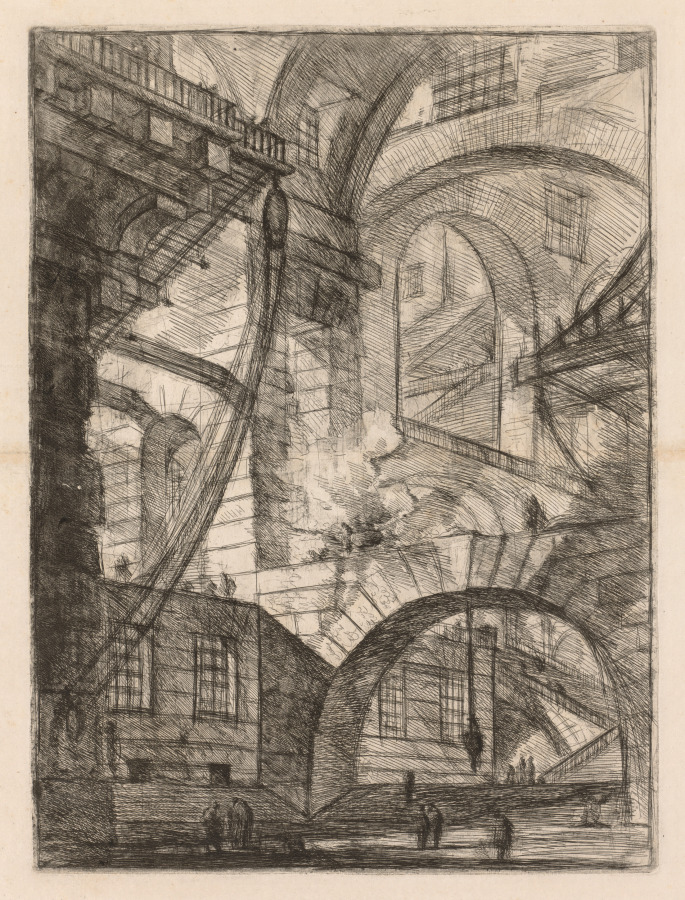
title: The Prisons: A Perspective of Arches with a Smoking Fire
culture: Italy, 18th century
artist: Giovanni Battista Piranesi (Italian, 1720–1778)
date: 1745–1750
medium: etching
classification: Print